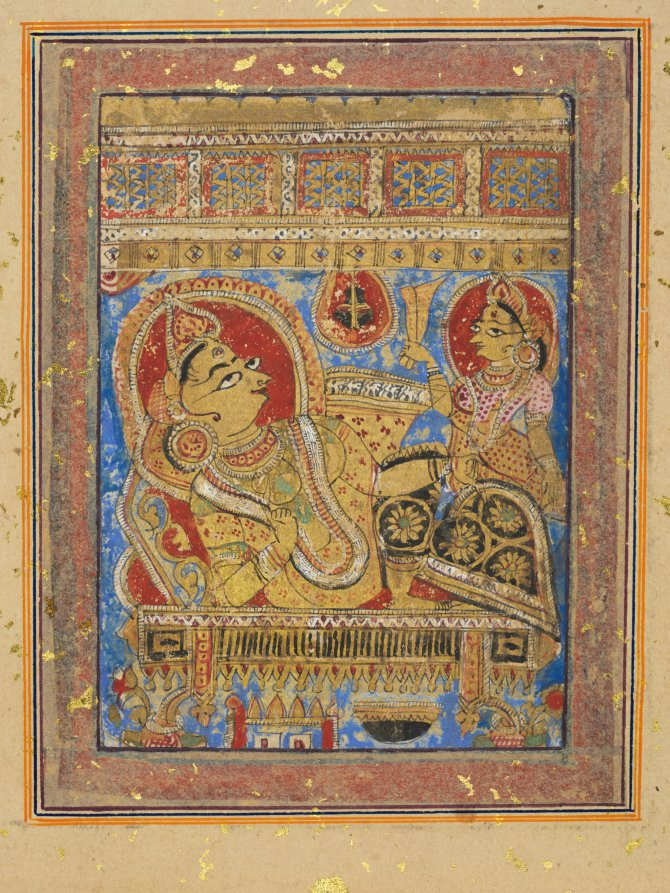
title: Painting from a Kalpa-sutra: Queen Trishala Reclining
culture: Western India, Gujarat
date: c. 1450–75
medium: Gum tempera and gold on paper; 18th century gold flecked border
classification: Painting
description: Until recently, and especially during the 1800s and early 1900s, the paintings in South Asian manuscripts were excised and mounted as individual works of art. These two paintings from a Jain manuscript of the Kalpa-sutra have been separated from the text and mounted with gold-flecked borders, like pictures in an album.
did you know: Queen Trishala is enjoying a happy pregnancy with the Jina-to-be.